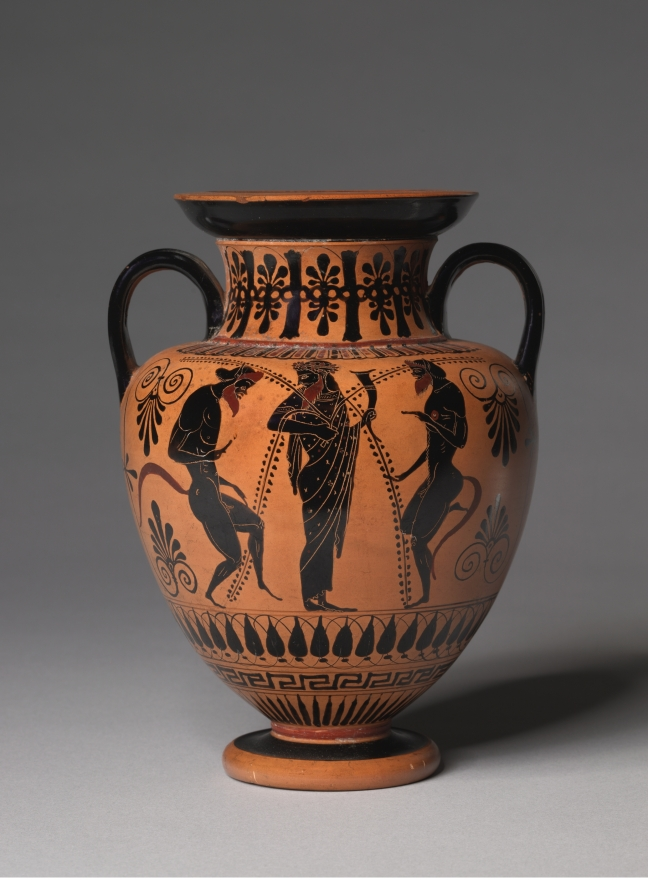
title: Black-Figure Neck-Amphora (Storage Vessel): Departing Warriors (A); Dionysos and Satyrs (B)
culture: Greek, Attic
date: c. 520–510 BCE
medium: ceramic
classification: Ceramic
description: Small in scale but finely painted and well preserved, this amphora depicts two common but unrelated subjects: the departure of warriors (side A) and Dionysos and two satyrs (side B). The warriors include an archer, identified by his bow and quiver full of arrows, and a heavily armed foot-soldier, wearing helmet and greaves and holding a spear and shield emblazoned with a horse protome. The archer faces a woman, while the warrior stands between two men.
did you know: A neck-amphora is a type of amphora with separately constructed neck and body.